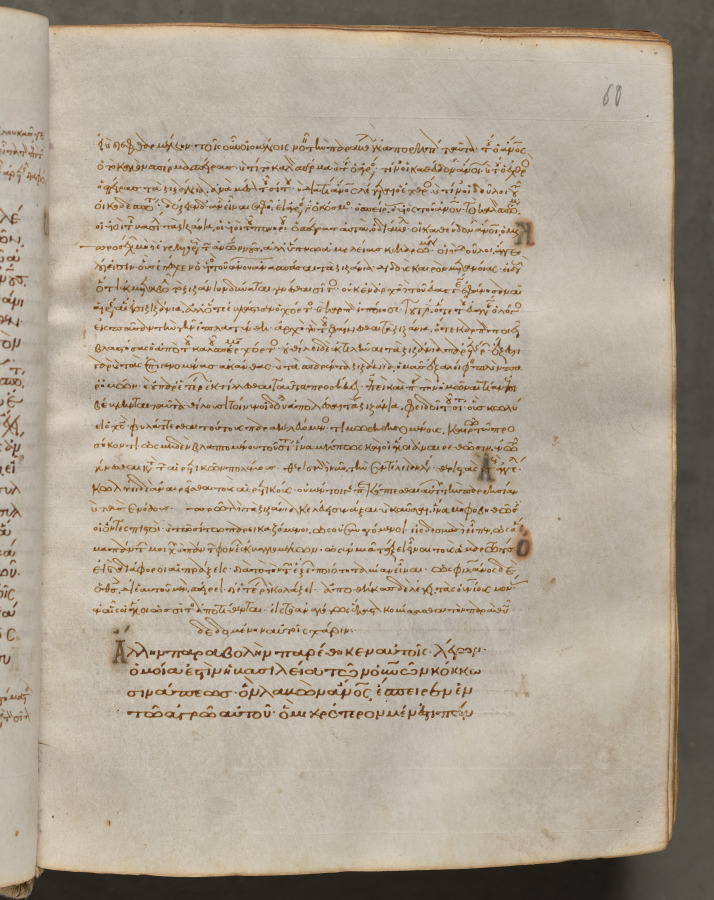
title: Text, folio 60 (recto), from a Gospel Book with Commentaries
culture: Byzantium, Constantinople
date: c. 1000–1100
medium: ink, tempera, and gold on vellum; leather binding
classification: Bound Volume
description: Each of the four gospels in this book opens on a page with brilliantly illuminated borders depicting the author of the text as well as birds-principally peacocks, symbols of the immortality of the soul-and fountains, representing the fountain of life and the salvation of the soul. This volume consists of 428 leaves with texts in Greek. Its level of sophistication suggests that it was probably written and decorated in a monastery in Constantinople.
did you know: Gospel Books were carried in procession through Byzantine churches.